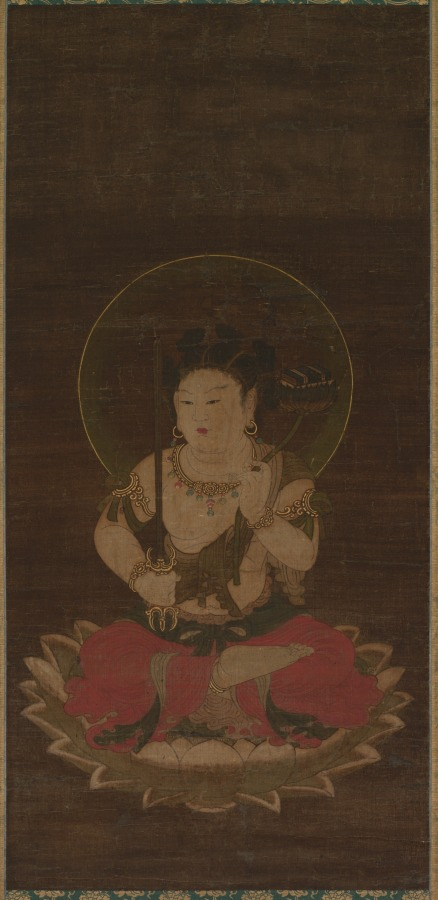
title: Monju as a Child (Chigo Monju)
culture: Japan, Muromachi period (1392–1573)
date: early 1400s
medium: hanging scroll; ink, color, and gold on silk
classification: Painting